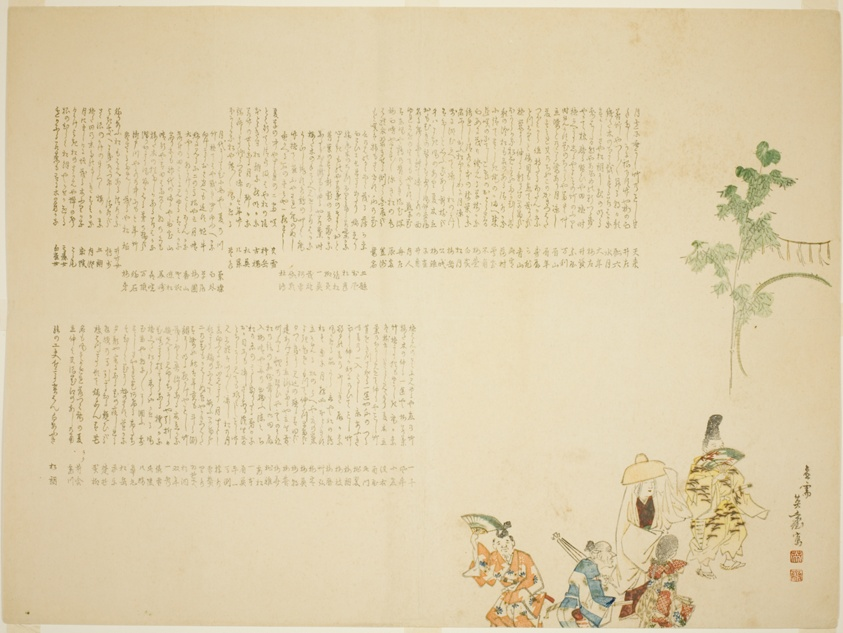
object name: Print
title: Festive Gathering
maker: Eisai (Japanese, active mid-19th century)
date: 1840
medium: Color woodblock print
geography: Japan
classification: print; asian art